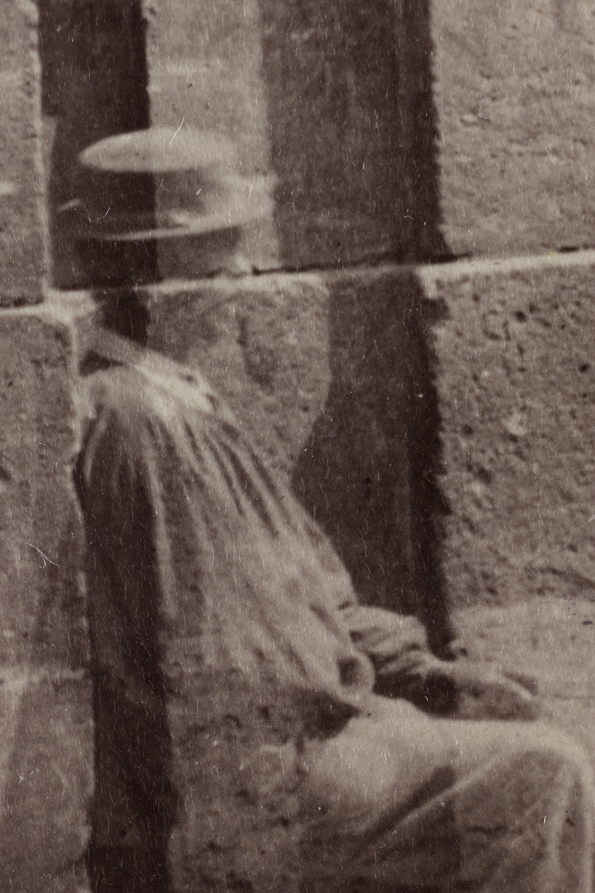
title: Street in Dijon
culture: France, 19th century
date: before 1870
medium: albumen print from wet collodion negative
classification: Photograph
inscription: Written in pencil on verso: "Dijon"